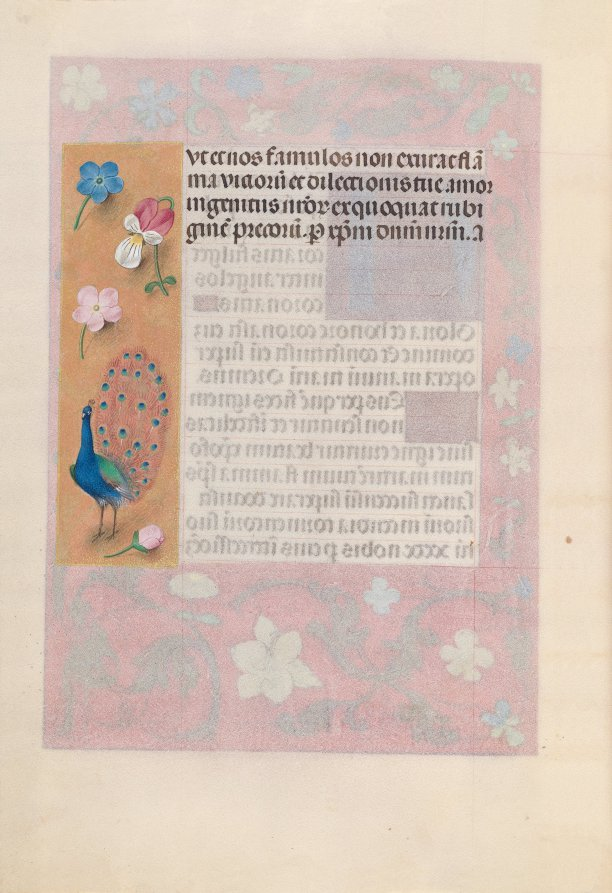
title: Hours of Queen Isabella the Catholic, Queen of Spain: Fol. 180v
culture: Flanders, Ghent and Bruges, late 15th century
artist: Master of the First Prayerbook of Maximillian (Flemish, c. 1444–1519)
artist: and Associates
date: c. 1500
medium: ink, tempera, and gold on vellum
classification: Bound Volume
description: This manuscript was illuminated by a circle of at least five highly organized manuscript painters active in the Flemish cities of Ghent and Bruges. The principal illuminator was Alexander Bening, who painted the majority of the book's miniatures. Manuscripts produced by this circle of artists are renowned for the decoration of their borders, which typically feature a rich variety of realistically-painted flowers, birds, and butterflies. This prayer book, called a book of hours, was intended not for a cleric, but for the private devotions of a lay person-in this case, Isabella the Catholic, Queen of Spain (1451-1504). Isabella's coat of arms embellishes the book's frontispiece. It is unlikely that the book was commissioned by the Queen herself; rather, she probably received it as a diplomatic gift from someone courting her patronage, perhaps Cardinal Francisco Jimenez de Cisneros. A Franciscan friar, Jimenez was dependent upon Isabella for his advancement, first to the post of Queen's confessor in 1492, and then to Archbishop of Toledo in 1495.